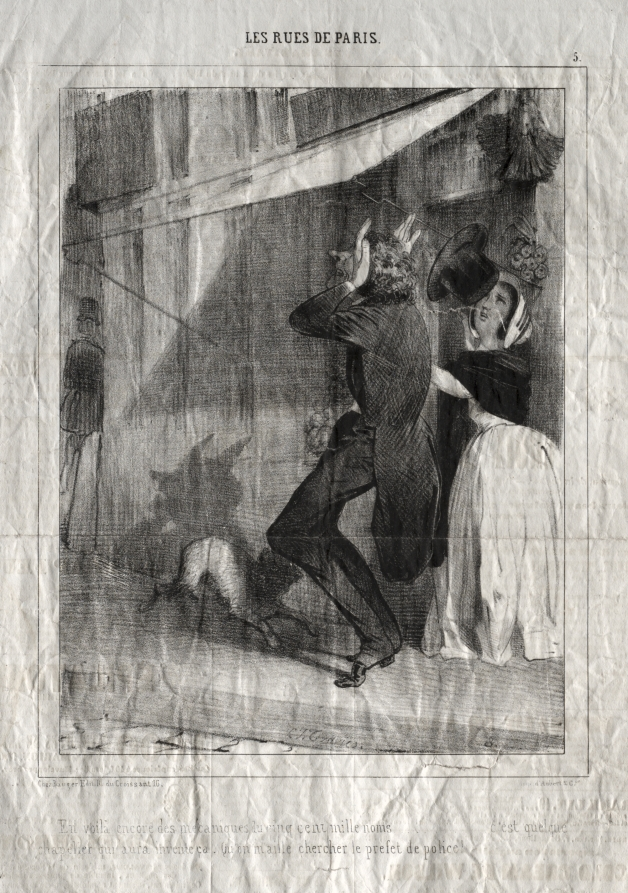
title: Les Rues de Paris: En voilà encore des mécaniques du cinq cent mille noms . . . c'est quelque chapelier qui aura invente ca. Ou 'on m'aille chercher le prefet de police!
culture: France, 19th century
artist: Charles Joseph Traviès de Villers (French, 1804–1859)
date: c. 1830–45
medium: lithograph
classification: Print